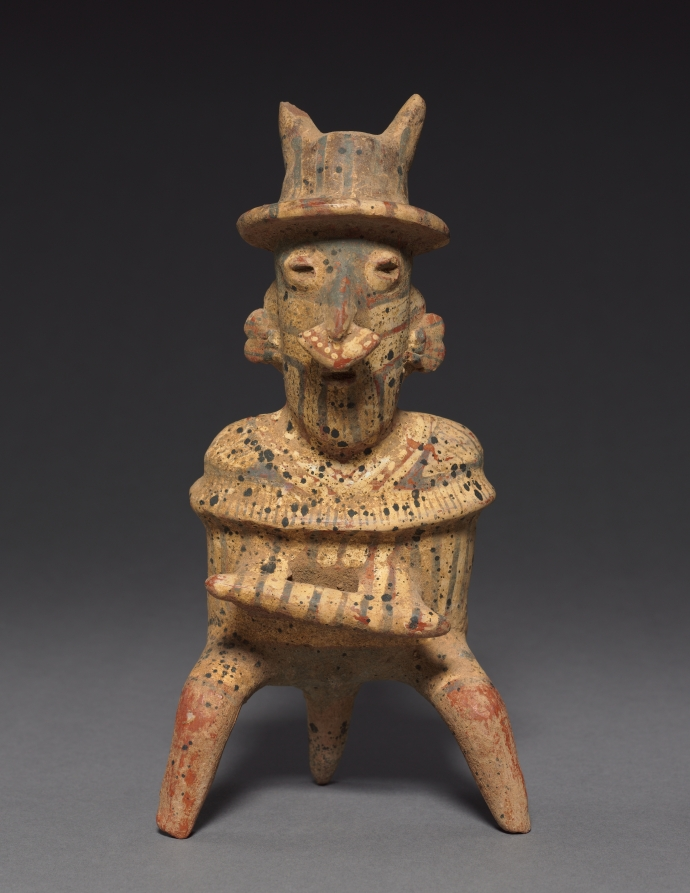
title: Seated Male Holding Chief’s Baton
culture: Mesoamerica, West Mexico, Nayarit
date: 200 BCE–300 CE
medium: ceramic, pigment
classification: Ceramic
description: The ancient artists of West Mexico specialized in ceramic sculptures in a range of sizes, investing their creations with a warm humanity regardless of scale. This tripod-shaped figure represents a well-dressed chief holding a baton of authority.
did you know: This tripod-shaped figure represents a well-dressed chief holding a baton of authority.